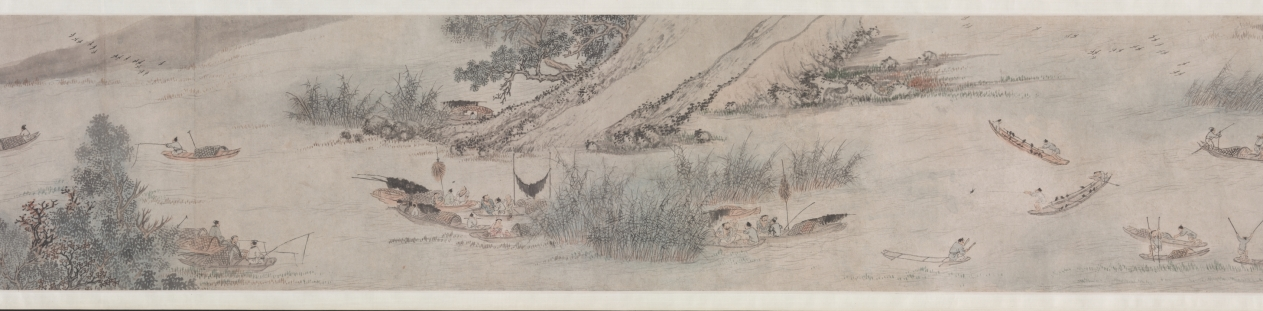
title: Fisherman's Joy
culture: China, Ming dynasty (1368–1644)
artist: Qian Gu (Chinese, 1508–c. 1578)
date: 1572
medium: Handscroll; ink and light color on paper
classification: Painting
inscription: Artist's inscription, signature, and seal: On the autumn day of the jen-shen year [1572], P'eng-ch'eng, Ch'ien Ku painted [this]. [seal] Hsüan-ch'ing shih. 2 colophons, both dated 1689, and 5 additional seals of Yün Shou-p'ing (1633-1690).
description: This painting has a scene showing two small crafts, each manned by two fishermen, practicing a traditional fishing method. In one of them, a man uses a bamboo pole to direct the movements of a cormorant bird sent into the water. Cormorant fishing, witnessed in some areas of the lower Yangzi River, appears in Zhe school paintings. Qian Gu may have borrowed these narrative figure scenes from Zhe school paintings, while his vantage point, brushwork, and soft tones align with the Wu school style. Scenes of fishermen appealed to urban and educated audiences who idealized the self-sufficient independence of fisherfolk.